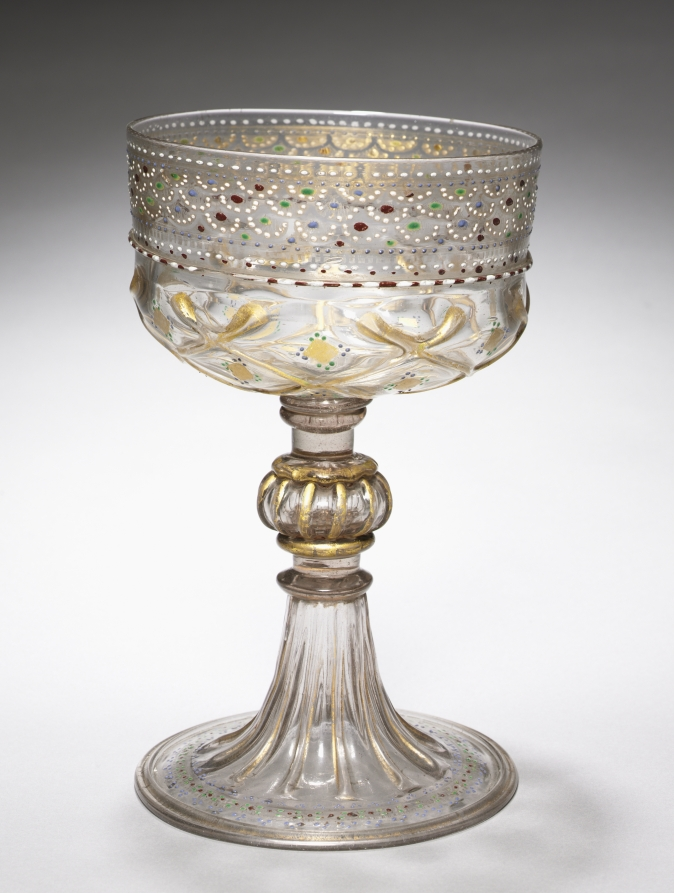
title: Standing Cup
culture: Italy, Venice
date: late 1400s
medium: glass, enameled and gilded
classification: Glass